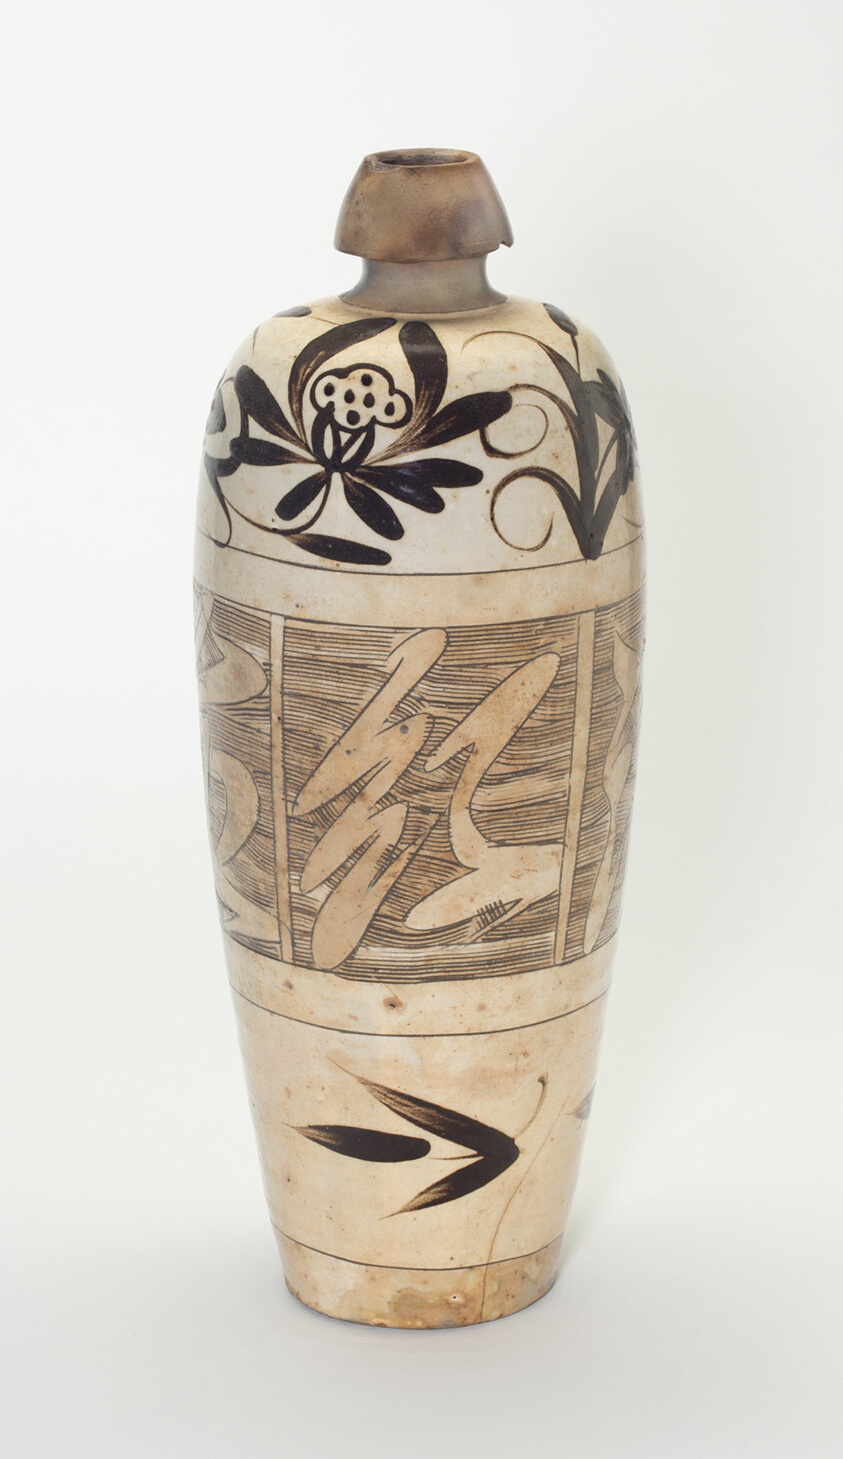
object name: Vessel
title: Elongated Ovoid Vase (Meiping) with Stylized Flowers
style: Chinese (culture or style)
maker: China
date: Jin dynasty (1115–1234), 12th century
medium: Cizhou ware; slip-coated stoneware with incised, combed, and overglaze painting in iron brown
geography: China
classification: vase; vessel; stoneware; asian art; ceramics